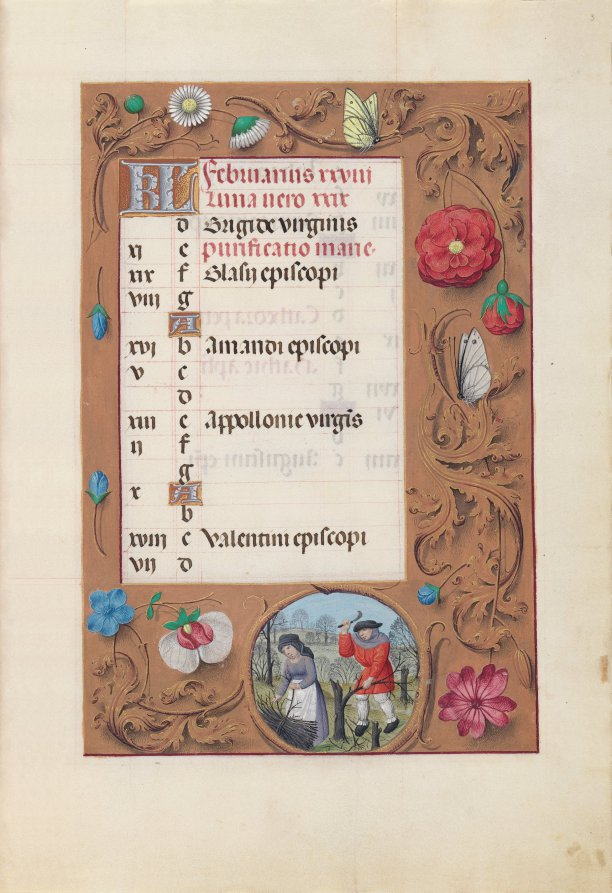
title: Hours of Queen Isabella the Catholic, Queen of Spain: Fol. 3r, February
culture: Flanders, Ghent and Bruges, late 15th century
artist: Master of the First Prayerbook of Maximillian (Flemish, c. 1444–1519)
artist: and Associates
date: c. 1500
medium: ink, tempera, and gold on vellum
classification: Bound Volume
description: This manuscript was illuminated by a circle of at least five highly organized manuscript painters active in the Flemish cities of Ghent and Bruges. The principal illuminator was Alexander Bening, who painted the majority of the book's miniatures. Manuscripts produced by this circle of artists are renowned for the decoration of their borders, which typically feature a rich variety of realistically painted flowers, birds, and butterflies. This prayer book, called a book of hours, was intended not for a cleric but for the private devotions of a lay person—in this case, Isabella the Catholic, Queen of Spain (1451–1504); her coat of arms embellishes the book's frontispiece. It is unlikely that the book was commissioned by the Queen herself; rather, she probably received it as a diplomatic gift from someone courting her patronage, perhaps Cardinal Francisco Jimenez de Cisneros. A Franciscan friar, Jimenez was dependent upon Isabella for his advancement, first to the post of Queen's confessor in 1492, and then to Archbishop of Toledo in 1495.